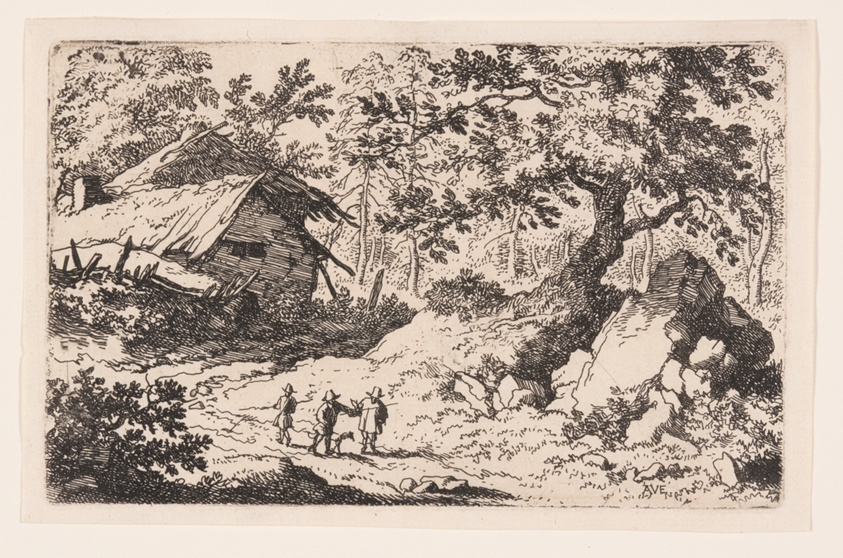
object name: Print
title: The Ruinous Cottage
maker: Allaert van Everdingen (Dutch, 1621–1675)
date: 1631/75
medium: Etching on paper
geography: Netherlands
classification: etching; paper; print; prints and drawing